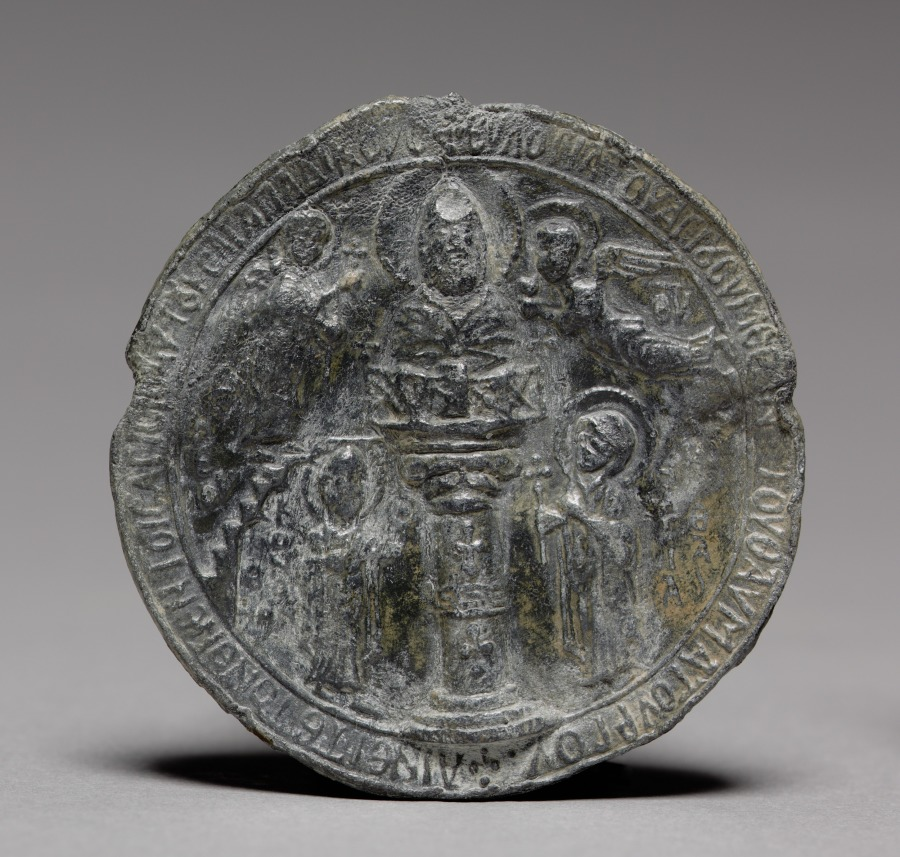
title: Pilgrim's Medallion with Saint Symeon the Younger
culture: Byzantium, Syria, Byzantine period, early 12th Century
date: c. 1100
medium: lead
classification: Metalwork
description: Saint Symeon the Younger was a stylite saint, an early Christian ascetic who fled the world for the desert and, perched on a column, spent his days fasting and praying. The site of Symeon’s column attracted many pilgrims during and after his lifetime. Medallions like this one, showing Symeon atop his column, were taken home by pilgrims in commemoration of their visit and were believed to serve their owners as protective talismans.